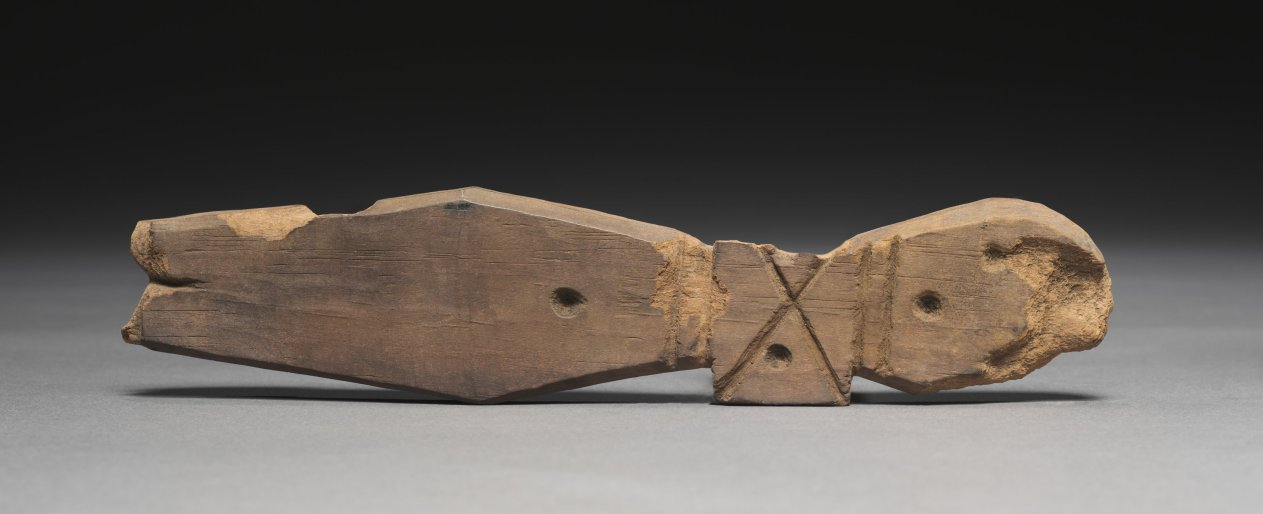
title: Fragment of a Cross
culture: Egypt, Greco-Roman period (332 BCE–395 CE), Roman empire (30 BCE–395 CE)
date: 30 BCE–395 CE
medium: wood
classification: Wood